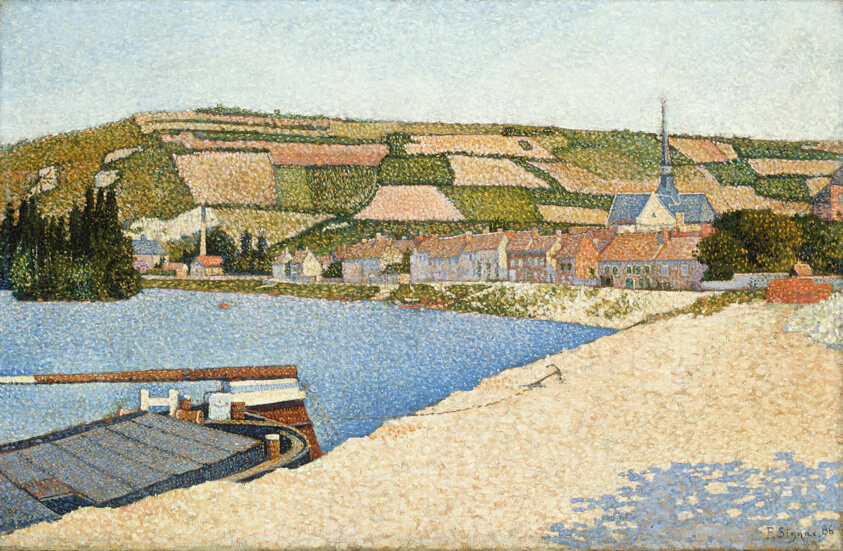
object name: Painting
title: Les Andelys, Côte d'Aval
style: Post-Impressionism, 19th century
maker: Paul Signac (French, 1863-1935)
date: 1886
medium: Oil on canvas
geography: France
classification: oil on canvas; paint; painting; european painting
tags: weather/seasons, boats, towns, farming, water, landscapes